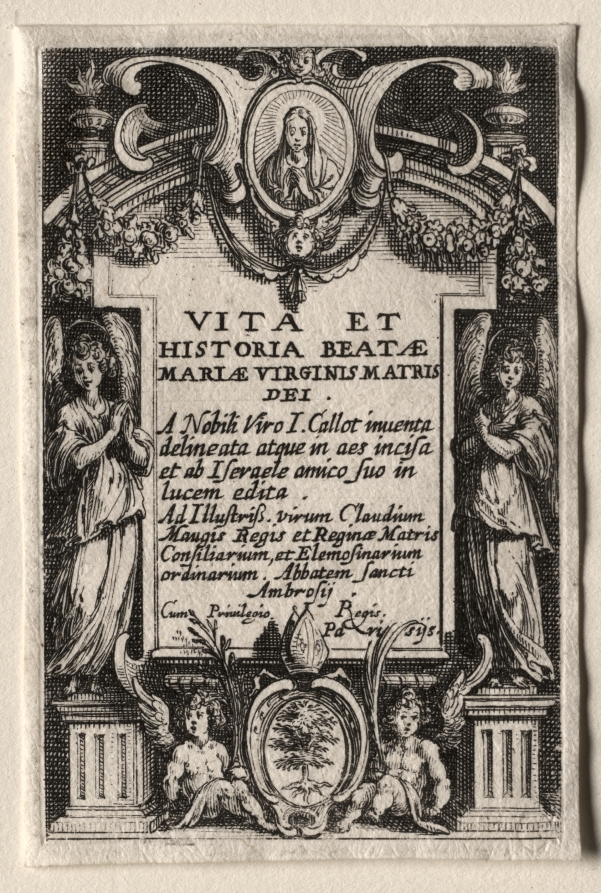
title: The Life of the Virgin: Frontispiece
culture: France, 17th century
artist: Jacques Callot (French, 1592–1635)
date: ca. 1633–34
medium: etching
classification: Print